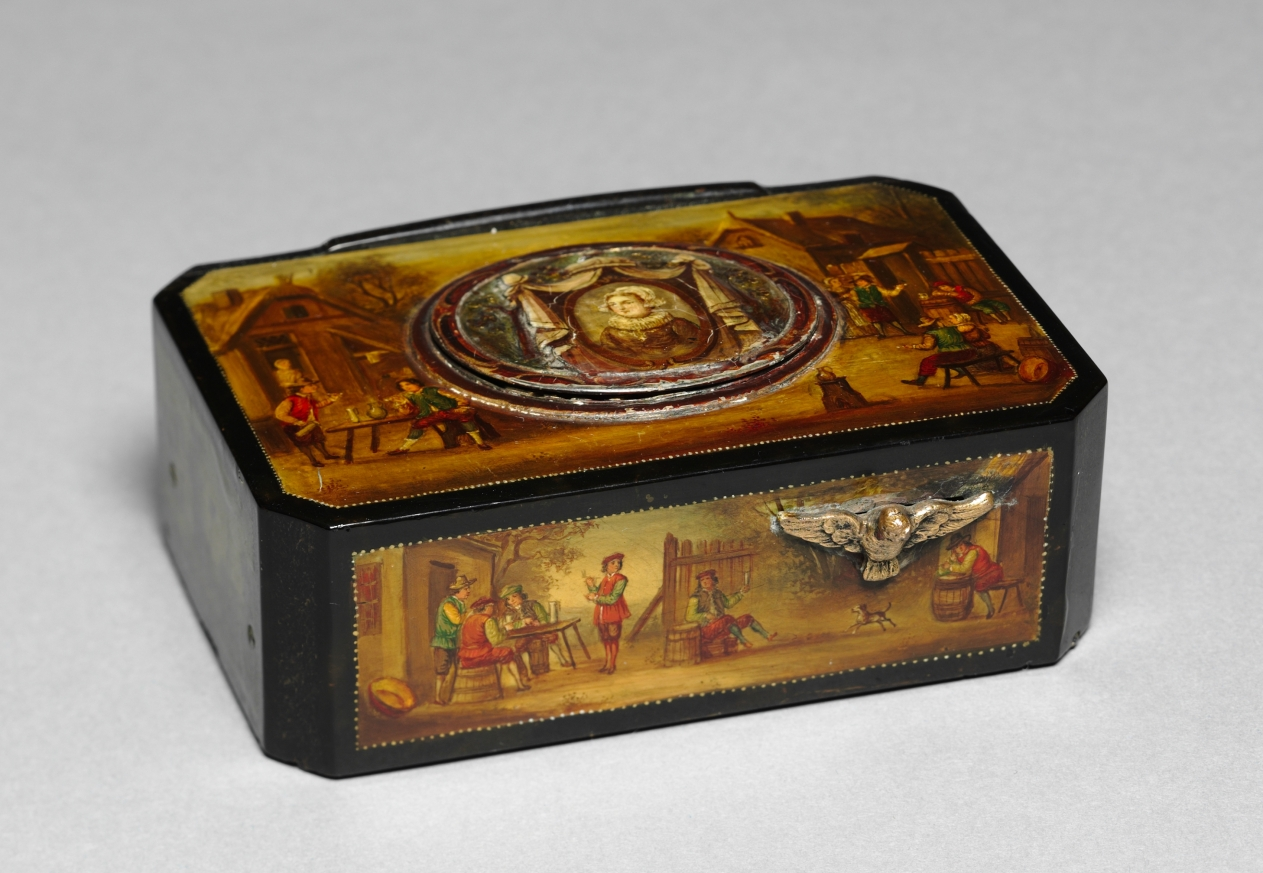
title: Music Box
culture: Switzerland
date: 1800s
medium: painted and gilded metal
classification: Miscellaneous